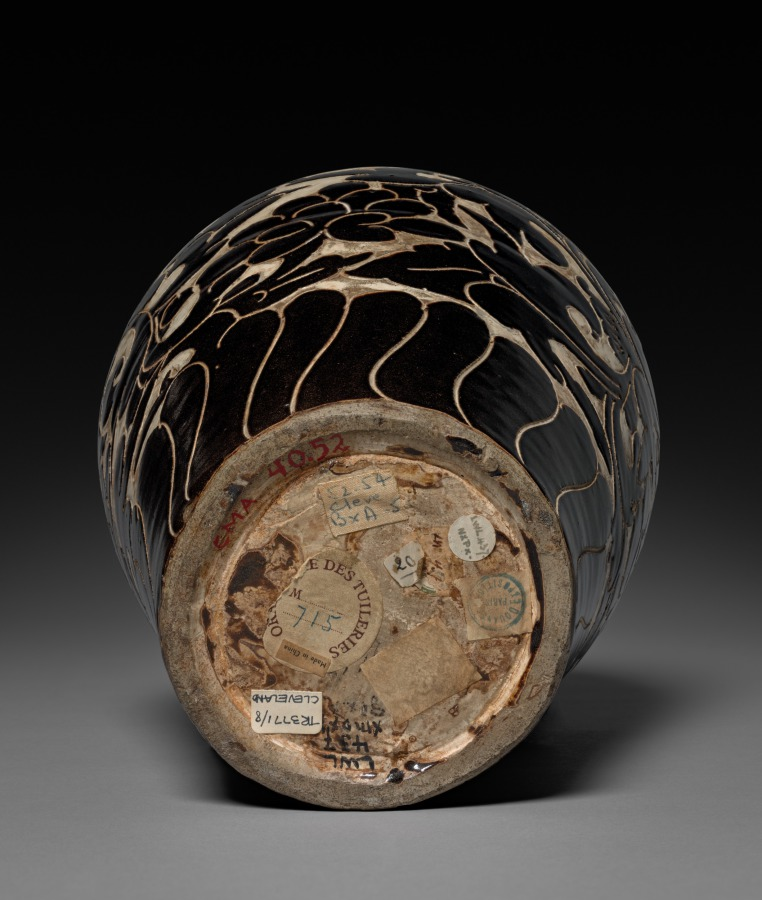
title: Vase with Peony Decoration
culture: China, Northern Song dynasty (960-1127)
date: 1000s-1100s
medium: Gray stoneware with underglaze slip decoration, Cizhou ware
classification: Ceramic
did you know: The thick foot rim is unglazed, while the shallow recessed flat base is covered with white slip and chance accumulations of underglaze pigment.